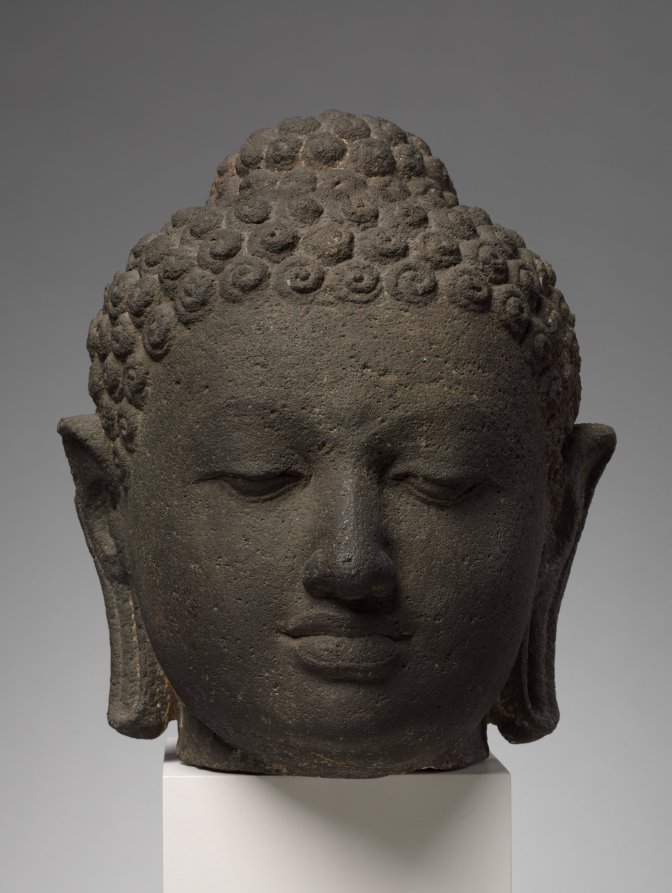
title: Head of Buddha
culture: Indonesia, Java, Borobudur, Sailendra Period, 9th Century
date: early 800s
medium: volcanic stone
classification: Sculpture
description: Serenity, tranquility, and compassion are expressively conveyed in the gently modeled, highly porous black stone of the volcanic island of Java. Borobudur, the massive, multitiered stone structure from which it came, still stands as one of the most impressive Buddhist monuments in the world. Concentric walkways with carved pilgrimage scenes lead up to vast terraces that originally had more than 500 life-size Buddha images, many of which still remain.